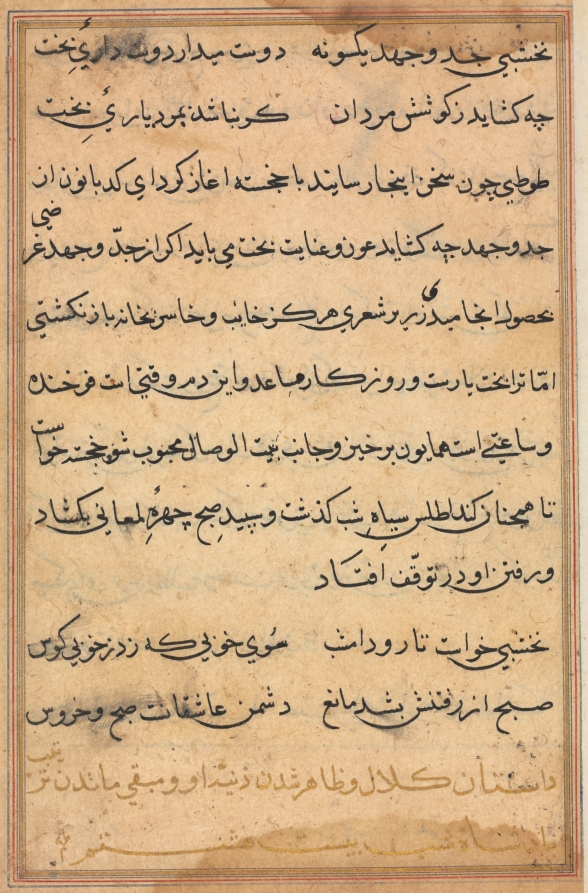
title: Page from Tales of a Parrot (Tuti-nama): text page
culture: Mughal India, court of Akbar (reigned 1556–1605)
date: c. 1560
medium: gum tempera, ink, and gold on paper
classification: Painting